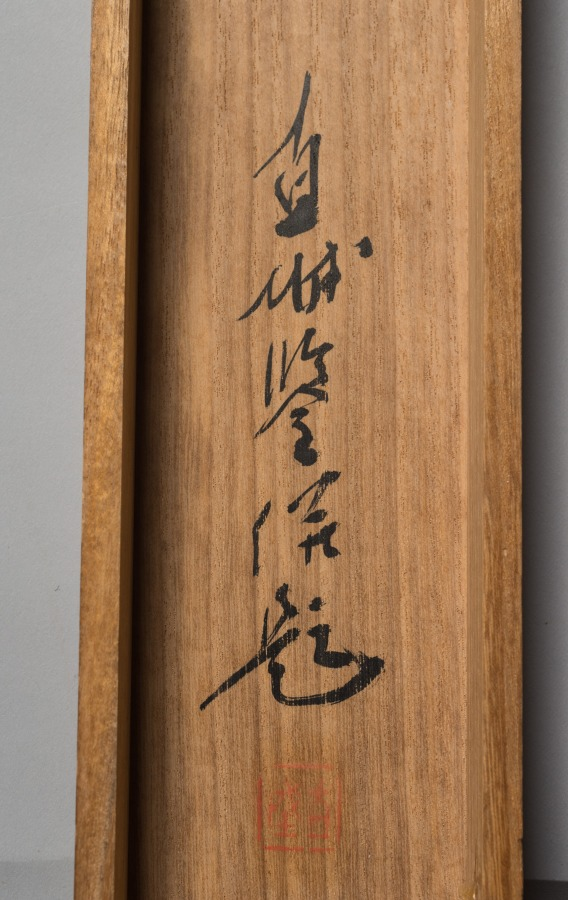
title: Needlefish (Yagara)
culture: Japan, Edo period (1615–1868)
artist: Nakajima Raishō (Japanese, 1796–1871)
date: 1870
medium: hanging scroll; ink and color on paper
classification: Painting